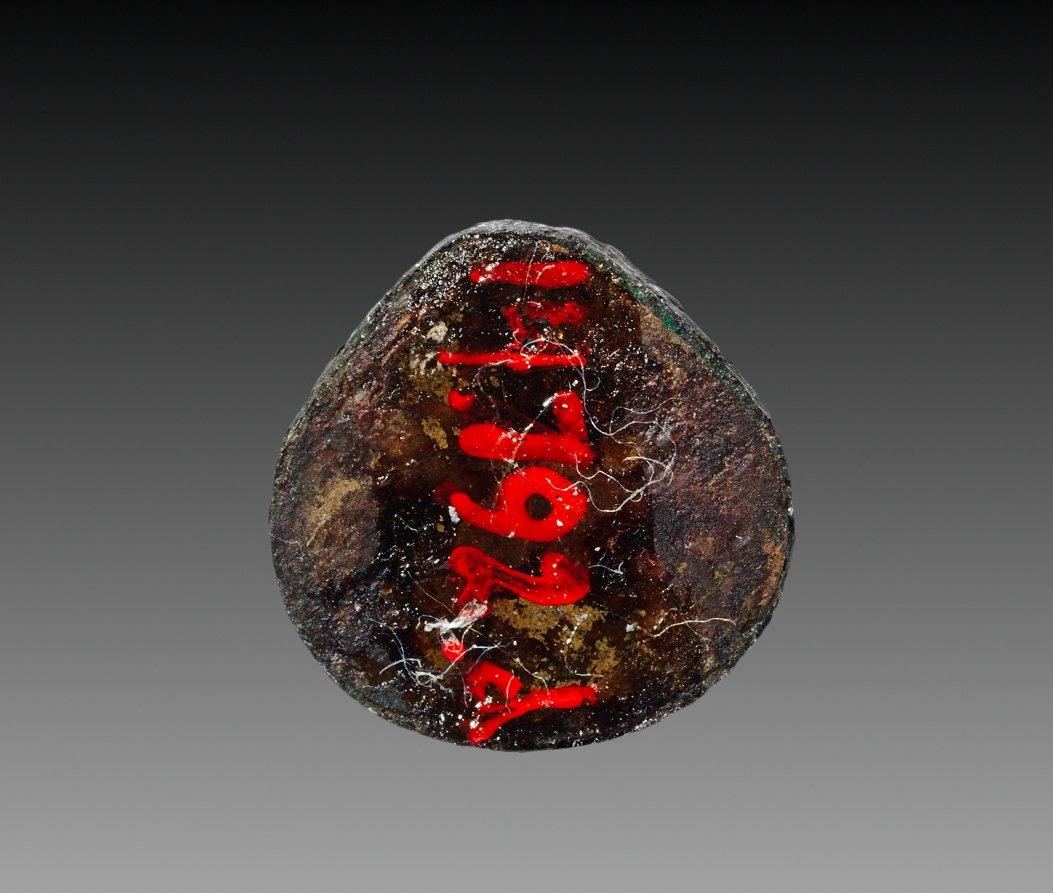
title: Oyster-Shell Pendant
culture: Egypt, Middle Kingdom (2040–1648 BCE), Dynasty 12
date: 1980–1801 BCE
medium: carnelian and silver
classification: Jewelry